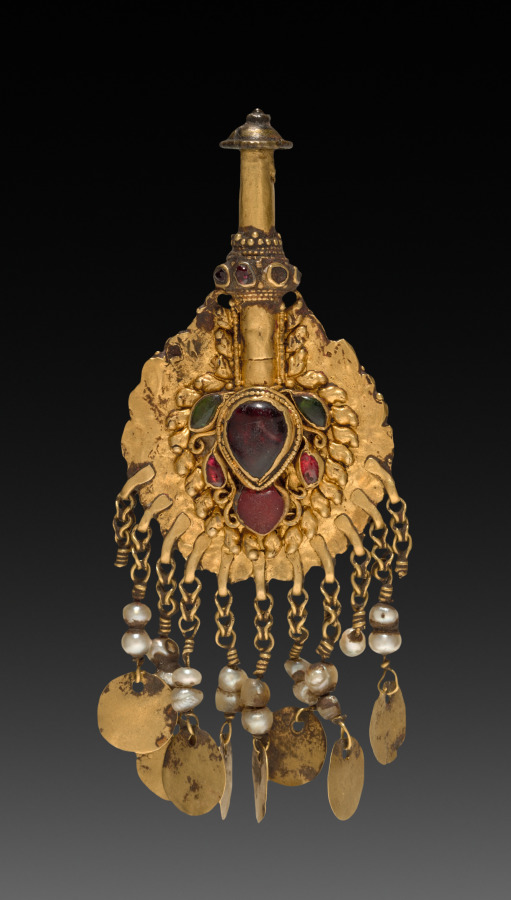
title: Earring with Vishnu Riding Garuda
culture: Nepal, Kathmandu Valley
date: 1600s or 1700s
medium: Gold set with precious and semiprecious stones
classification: Jewelry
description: This earring was made to hang on sculptures of deities worshipped in Nepalese temples. Nepalese craftsmen excelled at the detailed encrustation of jewels to depict complex figural imagery. They shaped gold wires into a framework, then inserted polished stones into the spaces, held in place with an adhesive. Four-armed Vishnu is made of sapphires; his mount the man-eagle appears to be made of carnelian and spinel with wings of turquoise.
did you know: This was among the first works to enter the museum's collection.